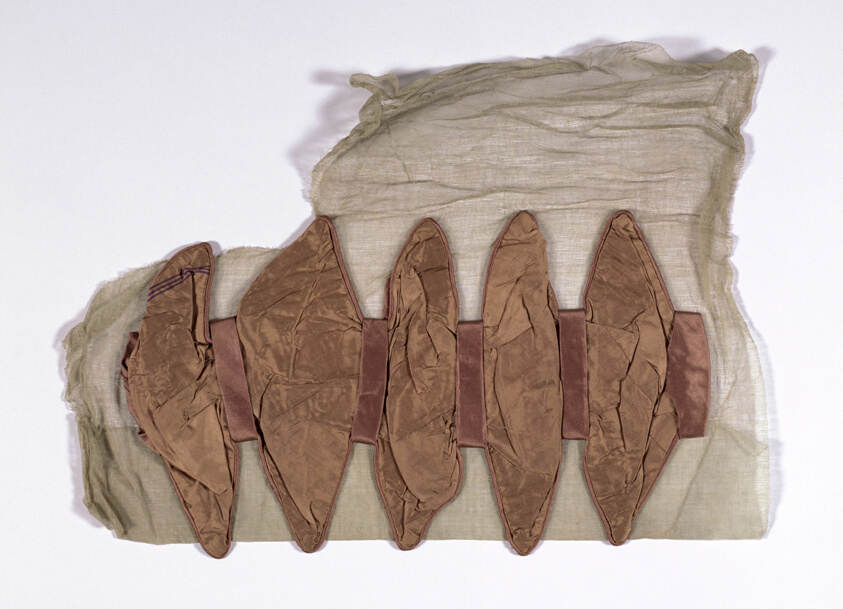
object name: Textile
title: Sample (Dress Trimming)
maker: England or France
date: 1815/35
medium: Silk, plain weaves and silk, satin weaves; pieced; backed with linen(?), plain weaves; sized; mounted to cotton, plain weave; sized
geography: France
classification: textile; needlework - costume; weaving